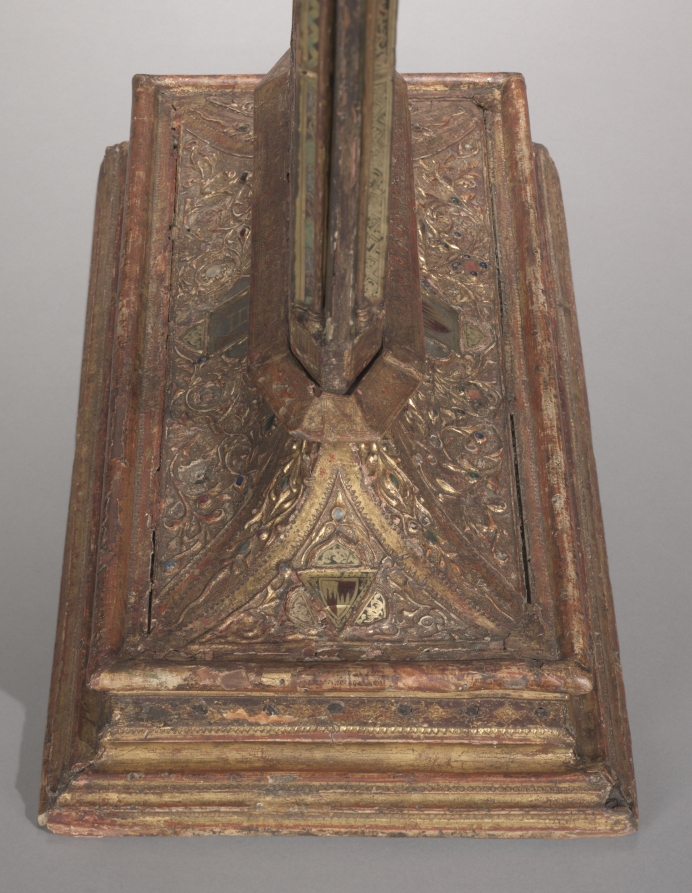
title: Frame for a Portable Reliquary Icon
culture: Italy, Siena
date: 1347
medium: gilded wood, modeled gesso, verre églomisé, glass cabochons, and relics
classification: Glass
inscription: an inscription with a stipled background runs around the lowest edge of the upright part of the frame: obverse: HOC/OPUS : FACTUM . FUIT . SUB . ANNO . DO/MINI; reverse: [small loss] /CCC . XLVII . TEMPORE . DOMINI . MINI/CINI. [This/work : has . been . made . under . year . of . the . Lord [small loss] /300 47 . in . the . time . of the Lord . Mini/Cini.] Another inscription appears on the obverse and reverse of the base: LUCAS ME FECIT. [Luke has made me.]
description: In the Middle Ages relics were thought to possess extraordinary power and were enshrined in lavish vessels called reliquaries. This complex frame once contained a painted image on each side, believed to be the Madonna and the Crucifixion, both long since lost. These images were surrounded by 17 carefully labeled relics, still visible. Intentionally portable, such votive objects could be easily carried from room to room or building to building as needed. A Latin inscription around the base reads: This work has been made under the year of the Lord CCCXLVII [1347] in the time of the Lord Mini/Cini. The inscription likely refers to Mino Cinughi, rector of the Hospital of Santa Maria della Scala in Siena, 1340-51. The Cinughi coat of arms as well as those of the hospital appear on the base. Another inscription, LUCAS ME FECIT (Luke made me), appears on both sides of the base. While this object probably resided on an altar in the hospital, the fact that it has two sides suggests it was carried aloft in processions.